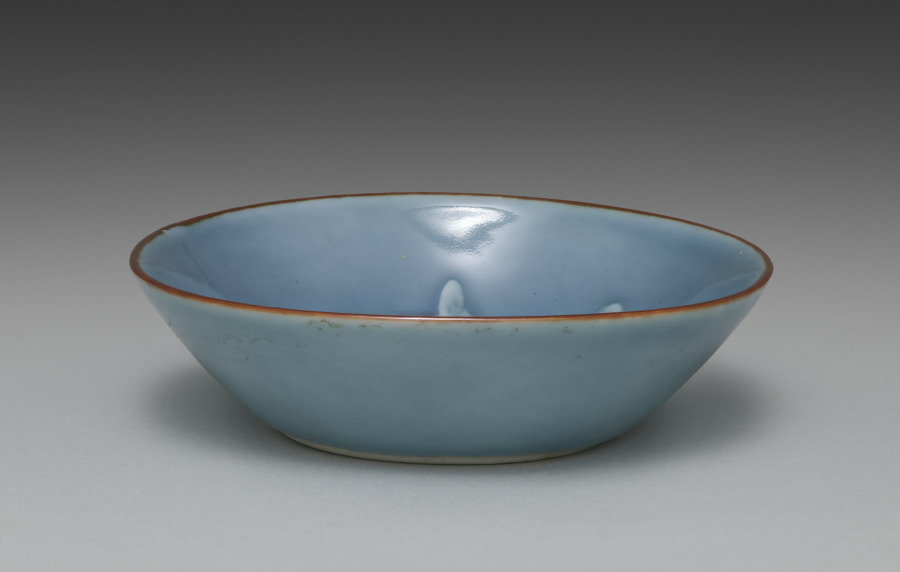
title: Dish from Dishes with Shells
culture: Japan, Taishō period (1912–26)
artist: Seifū Yohei IV (Japanese, 1872–1951)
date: 1914–46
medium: One from a set of five dishes; porcelain with blue glaze, iron oxide, and molded design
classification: Ceramic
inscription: 清風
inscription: 清風造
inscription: 清風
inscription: 成山清風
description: Yohei IV chose an aquatic theme for this set of five mukōzuke, side dishes. He added an iron oxide rim and used a concentrated blue glaze on both the interior and exterior. The glaze, named on the box lid, is his father’s “evening moon” (tsukiyoi) color. The conch in relief takes up the entire bottom of the dish. Up the sides are two snails on one end and on the other a scallop. This results in a boldly graphic, less realistic effect.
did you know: This set of dishes, mukōzuke, could be used for serving small side dishes at a tea gathering.